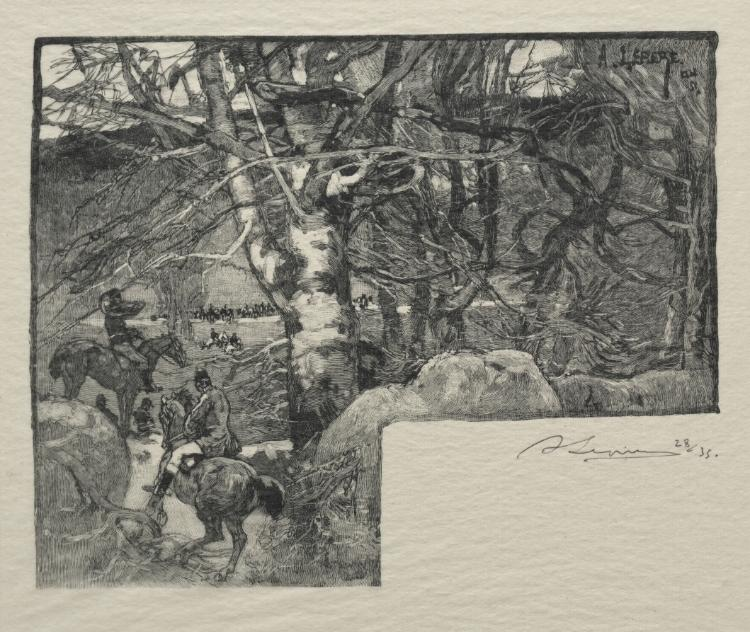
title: Une chasse à Courre au Mont Gerard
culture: France, 19th-20th century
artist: Auguste Louis Lepère (French, 1849–1918)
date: 1887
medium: wood engraving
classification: Print